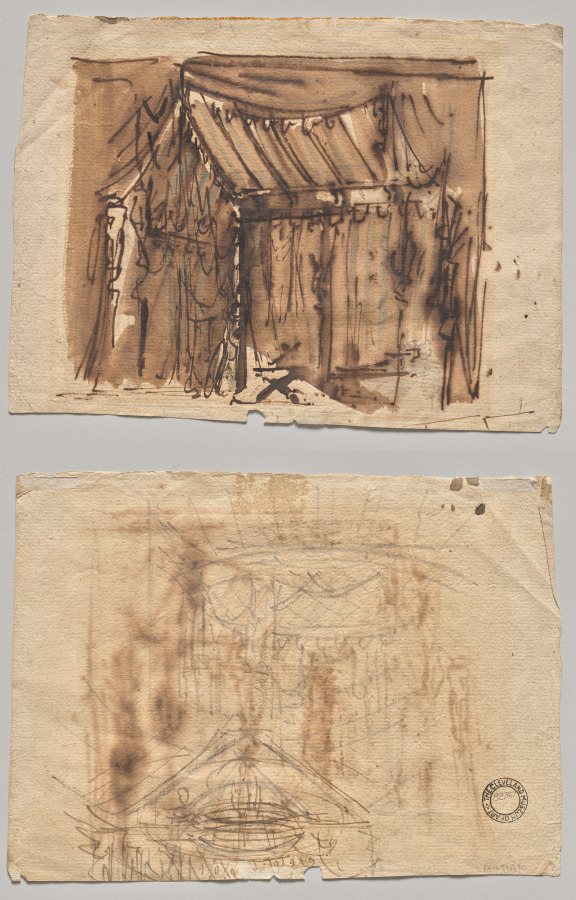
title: Tent (recto); Two Sketches (verso)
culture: Austria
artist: Josef Platzer (Austrian, 1751–1806)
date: late 1800s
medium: drawing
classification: Drawing